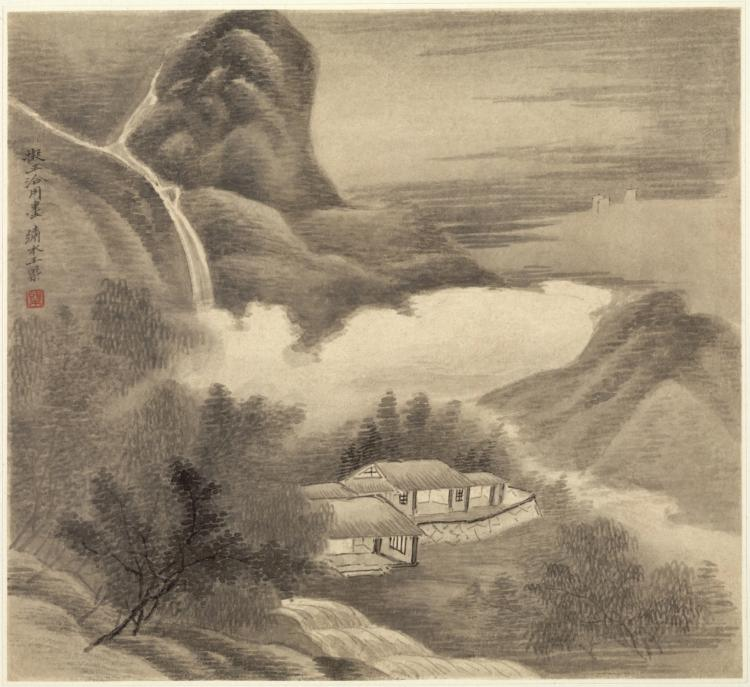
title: Album of Landscapes: Leaf 5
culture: China, Qing dynasty (1644-1911)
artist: Wang Gai (Chinese, active c. 1677–1705)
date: 1677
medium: album leaf, ink and light color on paper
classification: Painting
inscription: Artist's inscription, signature, and seal on leaf 5: In imitation of (T'ang) Wang Hsia's use of ink. Wang Gai of Hsiu-shui (seal) Gai Poem by Tai Wang-chin